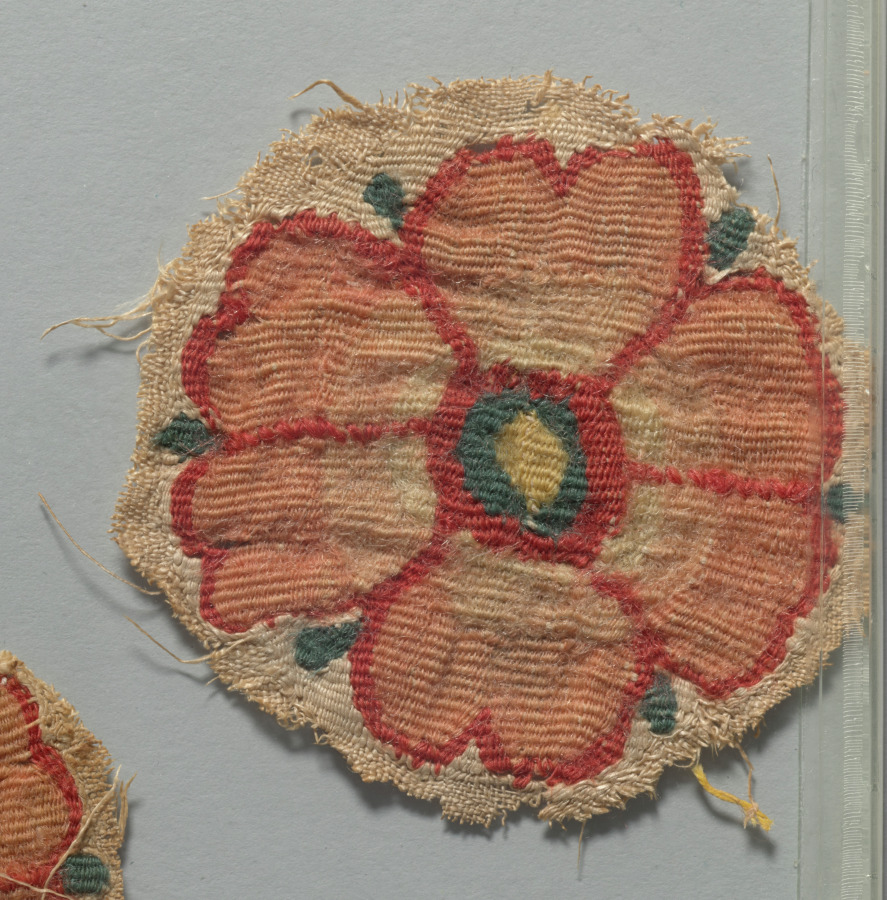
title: Fragments from a Curtain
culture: Egypt, Byzantine period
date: 300s–500s CE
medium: tapestry (originally inwoven in tabby ground, applied to plain tabby linen); linen and wool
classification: Textile